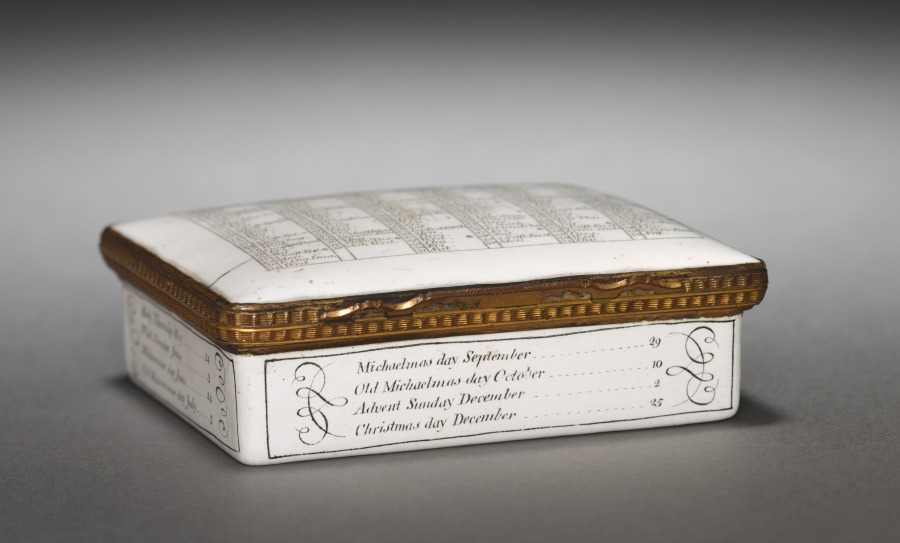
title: Snuff Box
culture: England, Birmingham, mid-18th Century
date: 1759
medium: enamel on copper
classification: Enamel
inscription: Dated: "1759"